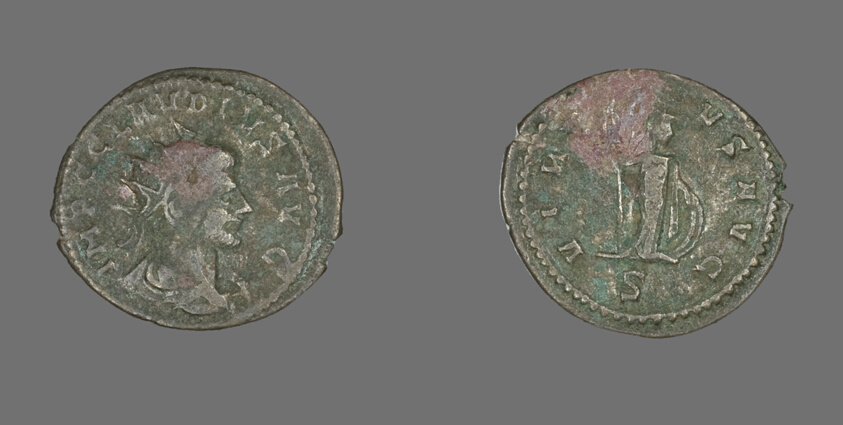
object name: Coin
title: Antoninianus (Coin) Portraying Emperor Claudius Gothicus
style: roman (ancient, style or period), ancient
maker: Roman, minted in Antioch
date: 260-270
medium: Billon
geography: Roman Empire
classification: coin; ancient art